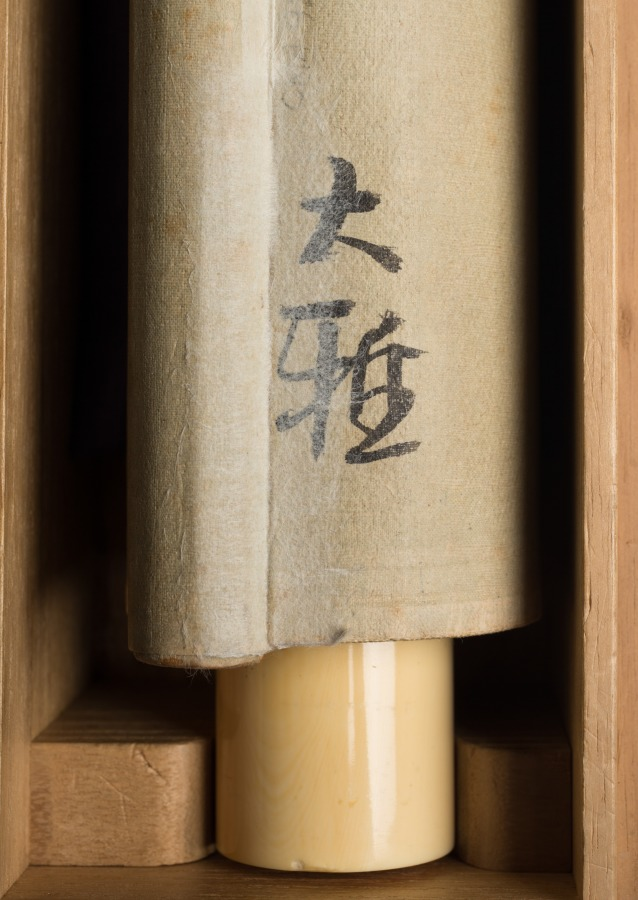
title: Illustration of Zhang Qi's Poem on the Cold Mountain Temple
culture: Japan, Edo period (1615–1868)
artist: Ike Taiga (Japanese, 1723–1776)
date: mid- to late 1700s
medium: hanging scroll; ink and color on paper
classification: Painting